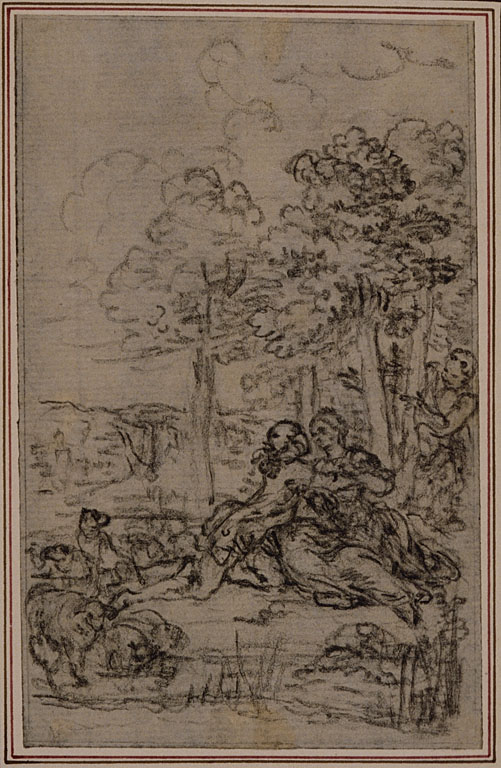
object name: Drawing and Watercolor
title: Study for Vignette in Fontenelle's (attr.) "Les Amours de Mirtil", Canto IV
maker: Hubert François Gravelot (French, 1699-1773)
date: c. 1761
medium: Black chalk, on gray laid paper, laid down on ivory laid paper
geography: France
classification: chalk; drawings (visual works); prints and drawing